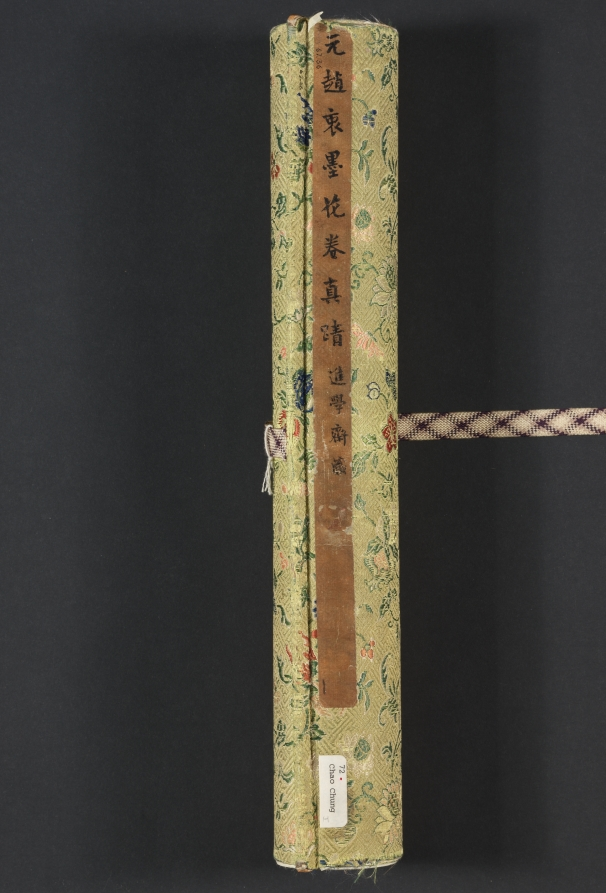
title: Ink Flowers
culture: China, Yuan dynasty (1271-1368)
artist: Zhao Zhong (Chinese, second half of the 1300s)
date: 1361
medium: Handscroll; ink on paper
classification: Painting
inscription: 寶帶同心結，香羅合歡扇。/ 繡作錦鴛鴦，雙雙為君獻。/ 薔薇露灑熏籠衣，馨香奉君君勿違。 原初并題。 [印] 趙衷原初畫記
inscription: 翠袂素羅韈，玉臺黃金盃。浩歌渡弱水。天風卷海三山開，麻姑方平為招飲，蛟宮獻舞銀濤堆。 原初并題。 [印] 雲林清趣、[印] 趙衷原初畫記。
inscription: 右用湯叔雅慶元中所寫墨花法作此卷，又效李長吉體賦詩以題之。詩與畫雖未工，要皆出於古人之餘，譬猶欲成方圓而必求其規矩之用也，識者毋誚焉！至正辛丑八月望日，東吳野人趙衷原初謹識。 [印] 趙原初、[印] 傳世清玩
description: Zhao Zhong's flowers, each paired with a poem, echo the fine-style colored flowers of the academic tradition, but instead he used only ink. Fine lines define the contours of each plant, as well as the veins within each petal and leaf. Careful ink washes give subtle modeling to the forms. The combination of lily, narcissus, and peony is unusual as the three belong to no known seasonal or symbolic system popular in the fourteenth century. Zhao’s medical training may have influenced the selection. Powdered lilies, for example, were prescribed to dispel grief, while the bark of tree peony roots was used as a treatment for various blood disorders.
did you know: This handscroll is a very rare example of ink flowers in the linear baimiao style of the fourteenth century.